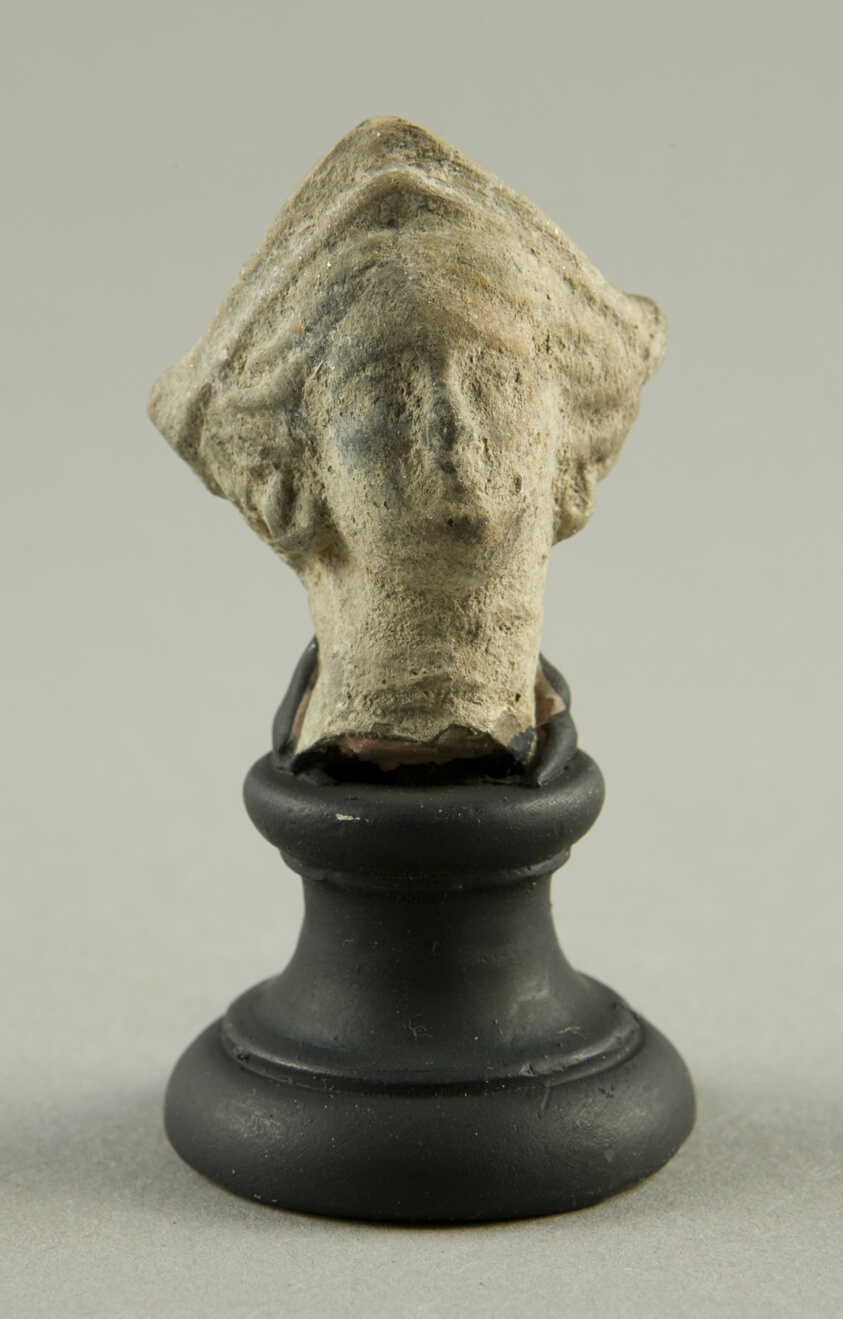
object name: Sculpture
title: Head of a Woman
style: greek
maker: Greek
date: 4th-3rd century BCE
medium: terracotta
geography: Greece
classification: earthenware; ceramics; sculpture; ancient art